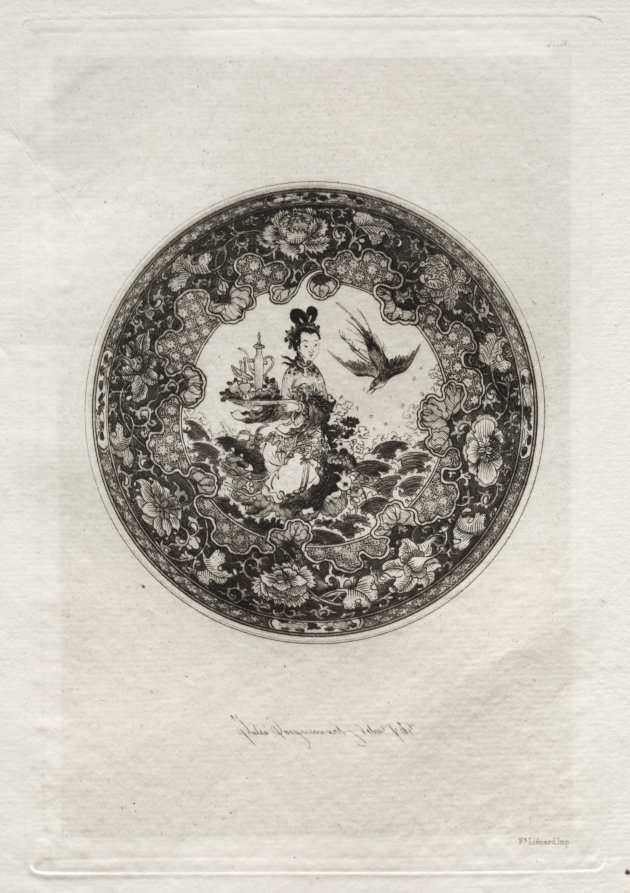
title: Saucer with Rich Enameled Ground and Medallion Representing the Goddess Kounin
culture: France, 19th century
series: History of the Ceramic Art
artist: Jules Jacquemart (French, 1837–1880)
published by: Ampson Low, Marston, Searle & Rivington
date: c. 1877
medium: etching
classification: Print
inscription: in plate, lower center: Jules Jacquemart